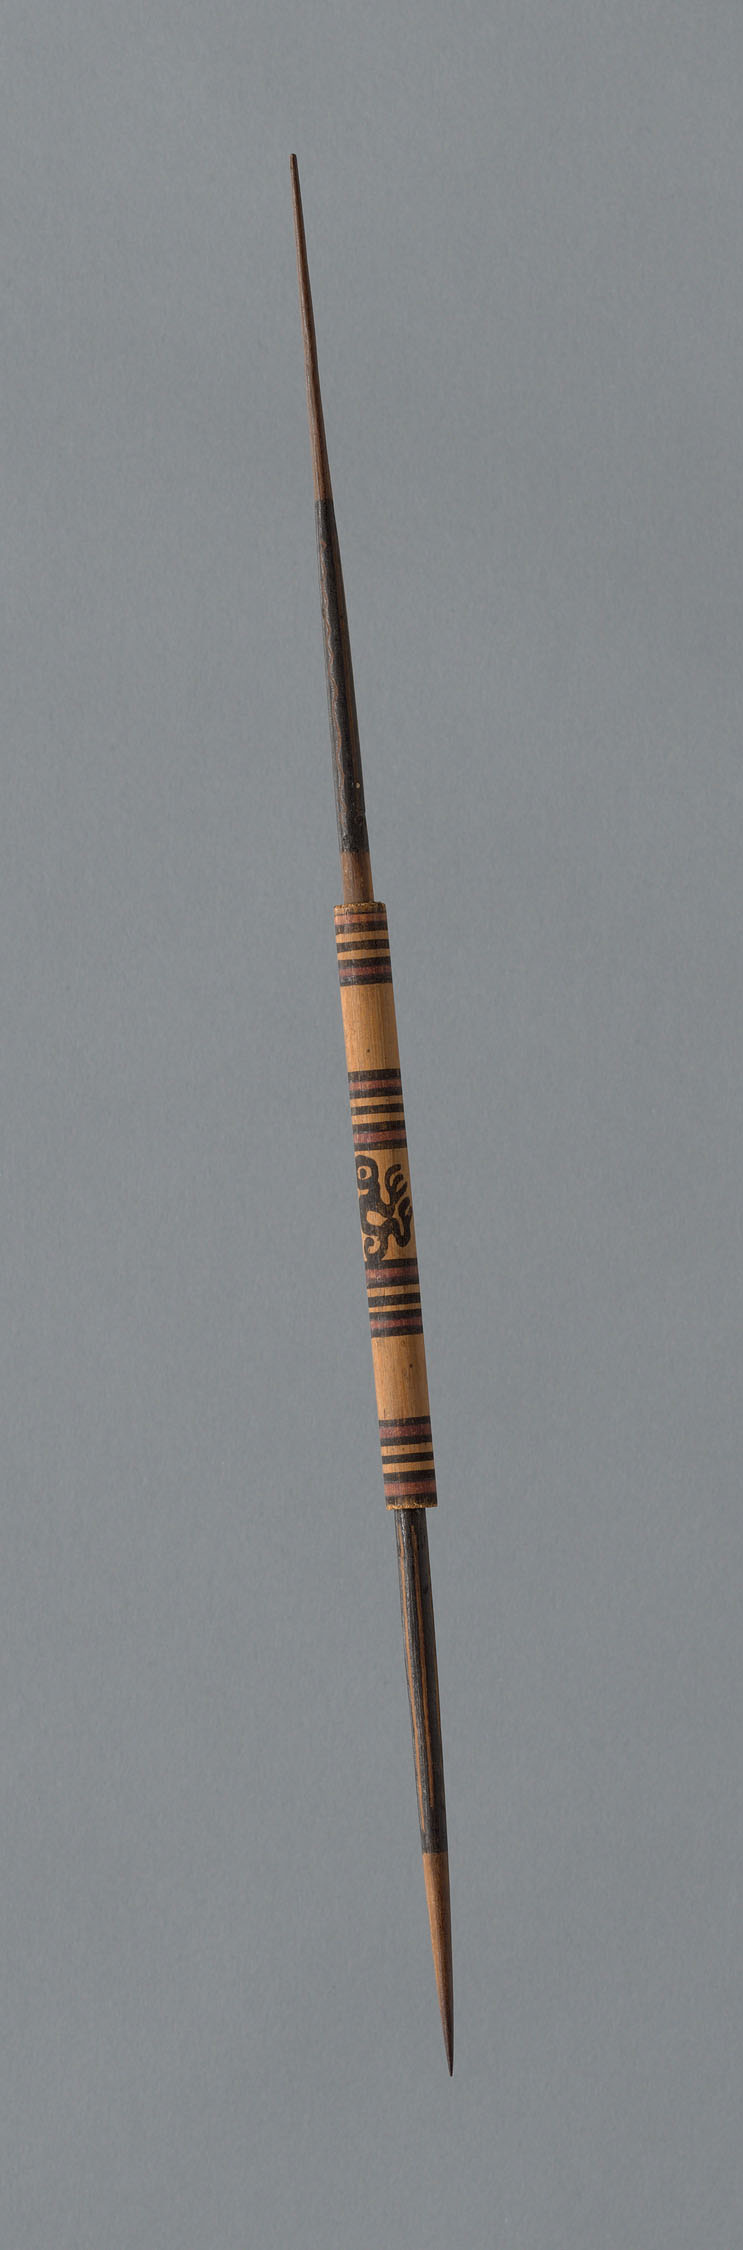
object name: non-art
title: Wooden Spindle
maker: Peru, Possibly central coast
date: 1000/1476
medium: Wood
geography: Peru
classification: spindles (textile working equipment); textile working equipment; accessories (object genre); textile